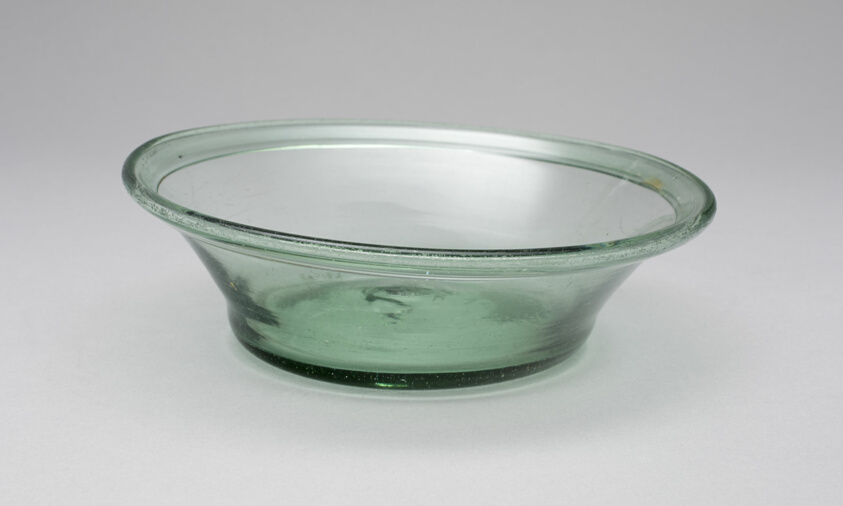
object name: Glass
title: Pan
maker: Mantua Glass Works (Mantua, Ohio, 1821–1829)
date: 1821–29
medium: Blown glass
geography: Mantua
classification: container; glass; american decorative arts; american arts; decorative arts